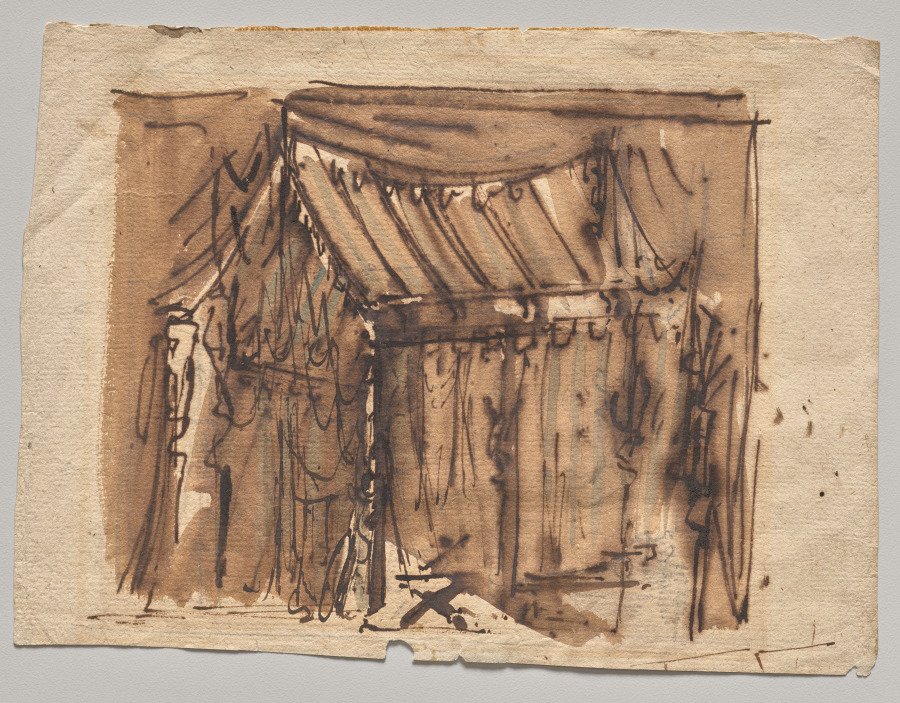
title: Tent (recto)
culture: Austria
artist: Josef Platzer (Austrian, 1751–1806)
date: late 1800s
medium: drawing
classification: Drawing